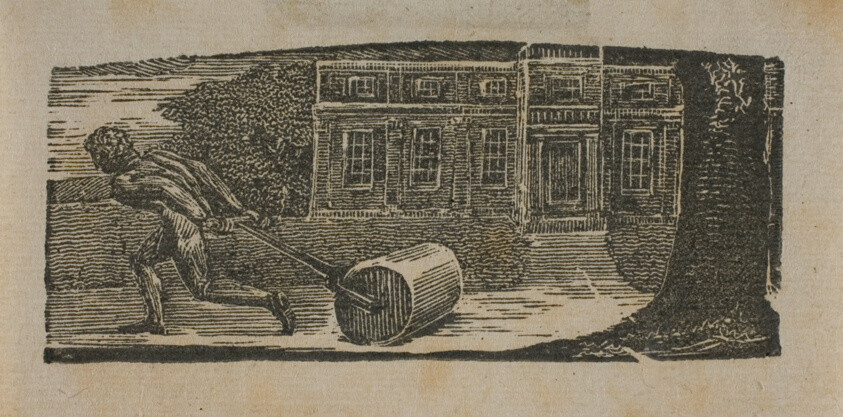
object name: Print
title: A Rolling Stone is Ever Bare of Moss, from The Pastorals of Virgil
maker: William Blake (English, 1757-1827)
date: 1821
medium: Wood engraving on off-white wove paper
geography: England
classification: wood engraving; print; prints and drawing; paper